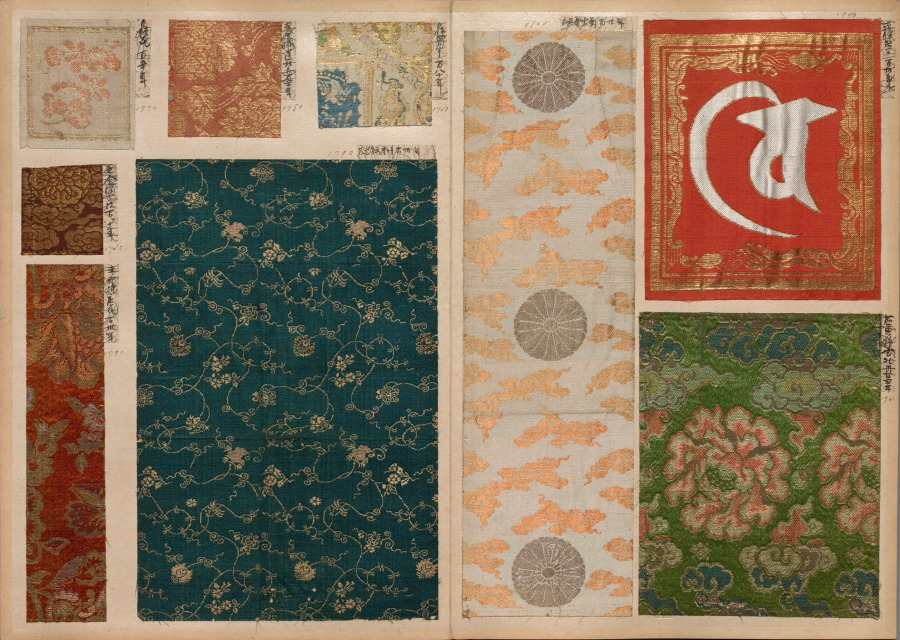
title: Album of Textile Samples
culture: Japan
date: 1790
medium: silk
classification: Textile